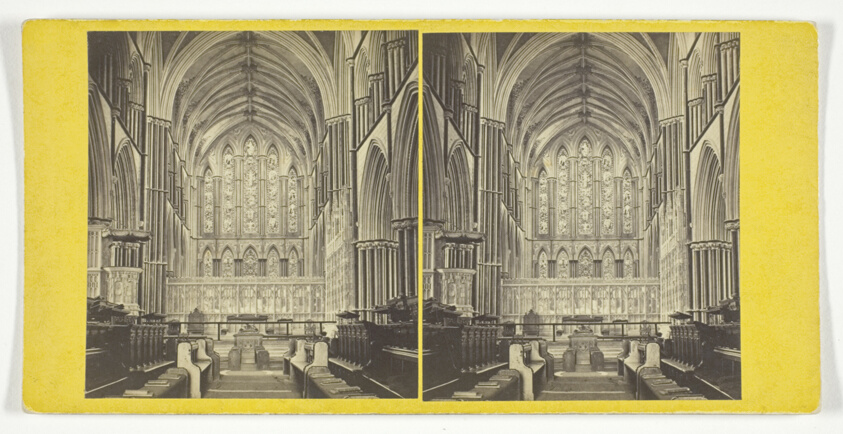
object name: Photograph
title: Worcester Cathedral - The Choir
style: 19th century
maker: G. W. Wilson (Scottish, 1823–1893)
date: Mid 19th century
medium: Albumen print, stereo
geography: Scotland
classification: photography; photograph